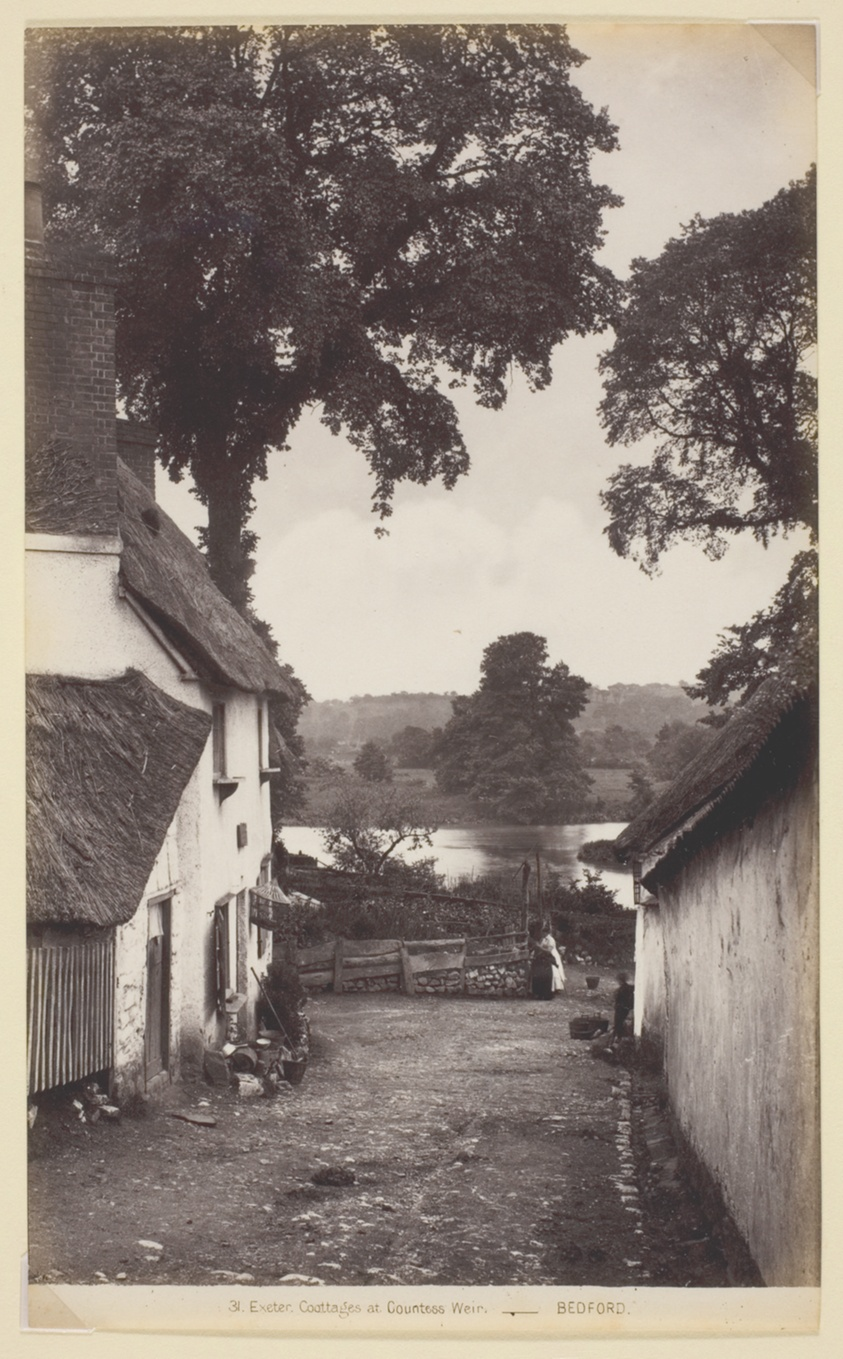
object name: Photograph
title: 31 Exeter, Cottages at Countess Weir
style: 19th century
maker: Francis Bedford (English, 1816–1894)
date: 1860/94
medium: Albumen print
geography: England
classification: albumen silver print; photographic process; photography; photograph